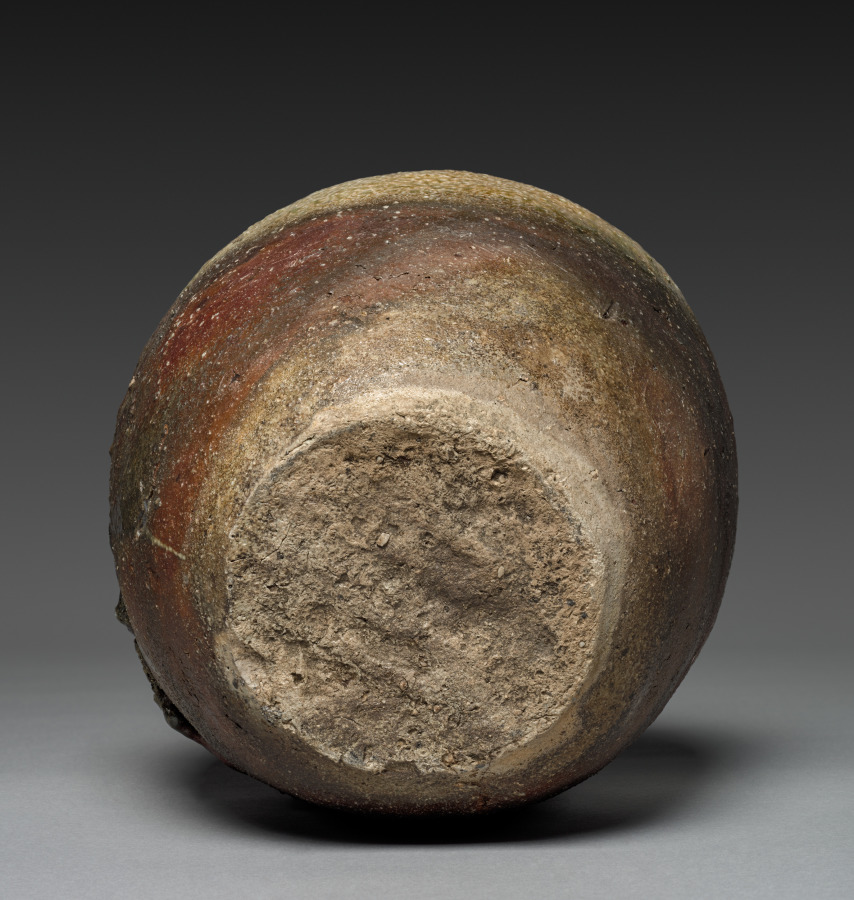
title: Storage Jar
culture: Japan, Muromachi period (1392–1573)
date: 1500s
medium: Stoneware with natural ash glaze (Shigaraki ware)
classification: Ceramic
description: Shigaraki ware is produced in the Shigaraki area of Shiga prefecture to the east of Kyoto in the Kansai region. The clay from Shigaraki has a warm orange color. When fired in an anagama kiln, a type of wood-fired kiln that uses the oxidization process, the free flow of air allows for the appearance of the ash and mineral glazes that characterize the works. Shigaraki storage jars like this one, a tsubo, have been popular for storing tea leaves since the Muromachi period.